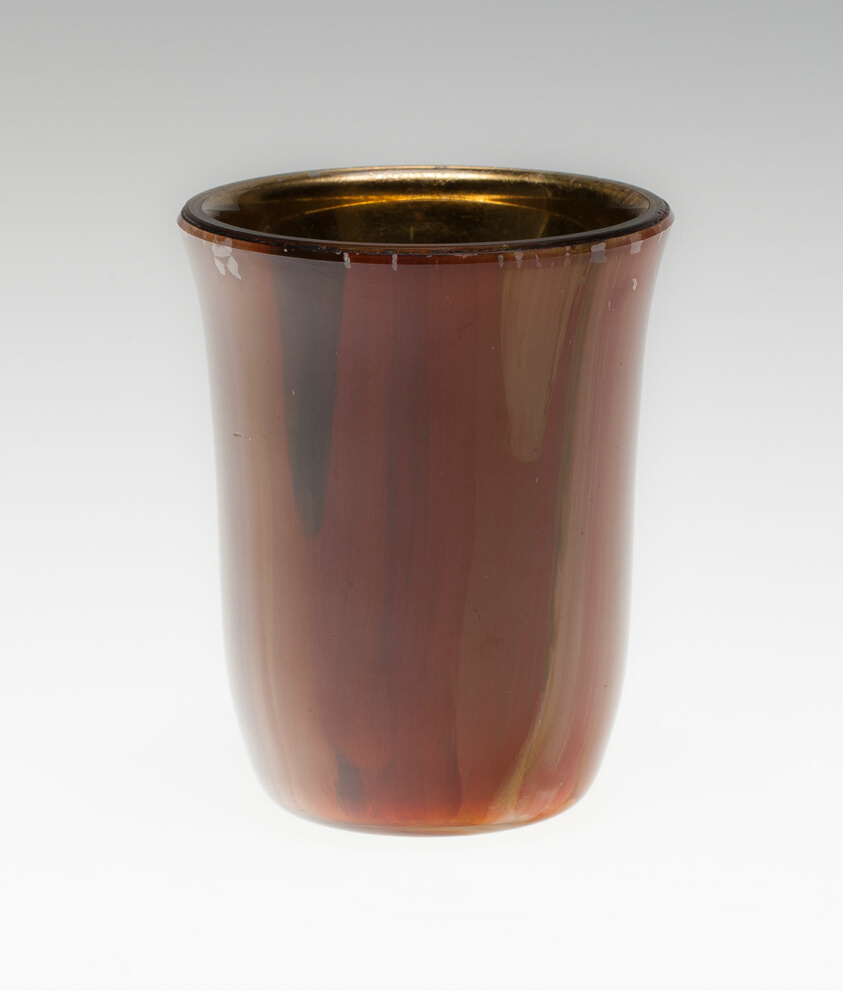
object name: Glass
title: Lithyalin Beaker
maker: Workshop of Friedrich Egermann; Bohemian, 1777-1864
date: c. 1830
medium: Glass; marbled opaque red, blown and gilded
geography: Bohemia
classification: drinking vessel; glass; european decorative arts